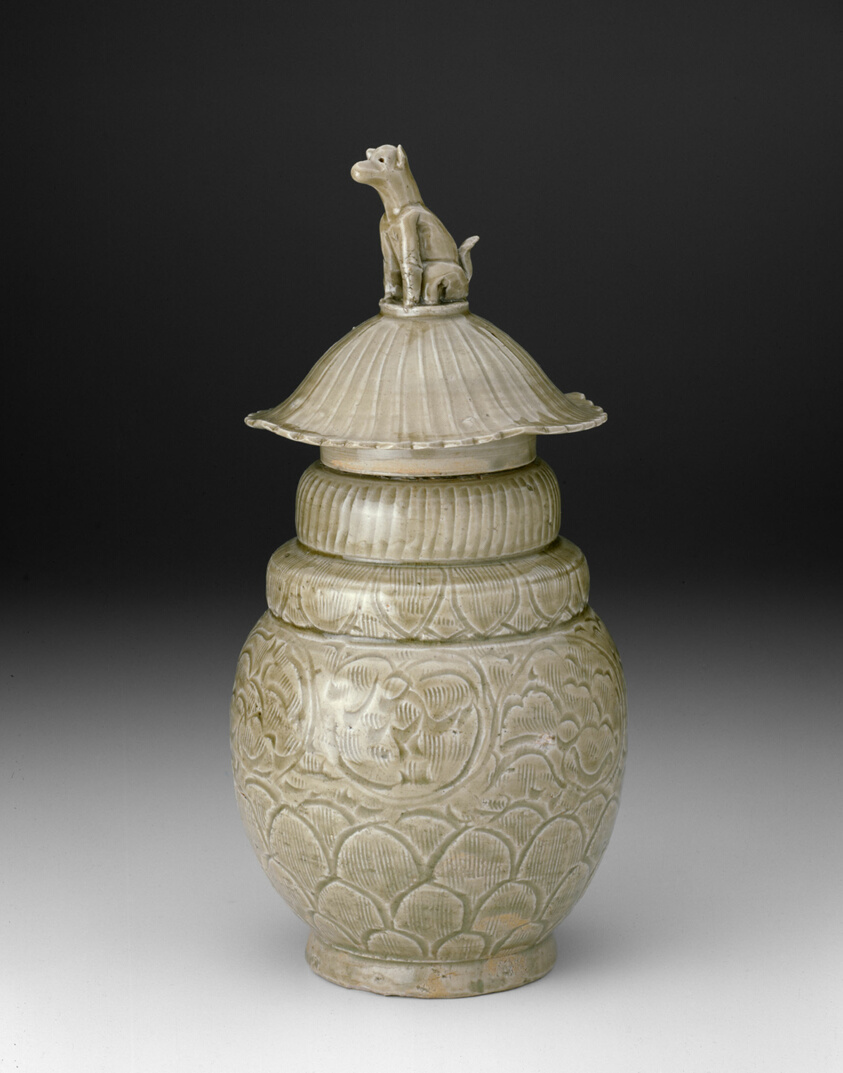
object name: Vessel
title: Covered Jar with a Seated Dog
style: Chinese (culture or style)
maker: China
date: Northern Song dynasty (960–1127), late 10th/early 11th century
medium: Longquan ware; stoneware with underglaze mold-impressed and carved decoration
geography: China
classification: stoneware; asian art; ceramics; vessel